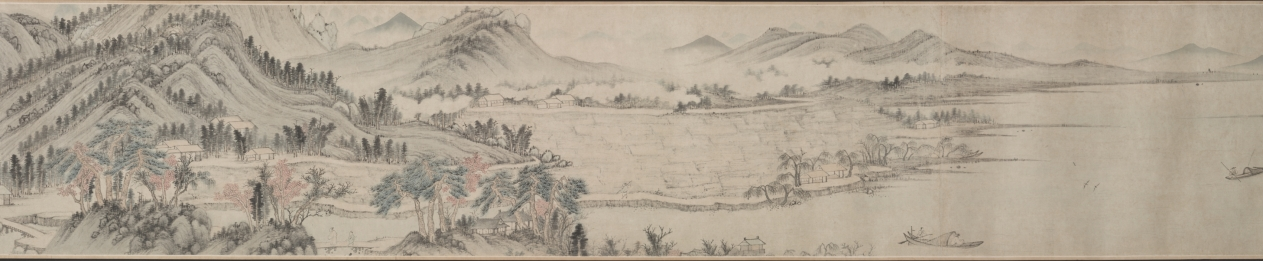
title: Mt. Taibo in the Style of Wang Meng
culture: China, Ming dynasty (1368–1644)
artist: Du Qiong (Chinese, 1396–1474)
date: 1442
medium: handscroll; ink and light color on paper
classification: Painting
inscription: Artist's inscription, signature, and 11 seals: [1 seal] Tung-yüan chai. Huang-ho-shan-ch'iao [Wang Meng] painted a painted called T'ai-po Mountain. Its brushwork is superior and admirable, which is very close to Yu-ch'en [Wang Wei, 699-759]. The cleverness of its composition, the maple groves and rustic temples, the inaccessible ravines and autumnal plateaus, the periolous peaks and strange rocks, etc., all seem to be so natural. The paper is only a little over eight feet, but the landscape has the range of a thousand miles. Once you open and note the contents, it is as if one were roaming among the mountain peaks enveloped in mist and clouds, and forgot the dusty world. When I first saw this, I was so mixed with excitement and joy that I could not take my hands off the painting. So I put it on the table, and tried my best to imitate it, forgetting sleeping and eating for about three months before it was completed. Although I do not dare to tread in the footsteps of Huang-ho shan ch'iao, I took great pains to capture his spirit in composition and colors. I do not know whether it would pass the judgment of the experts. On the fifteenth day of the fifth month, the seventh year of the Cheng-t'ung year [1442], inscribed by Tung-yüan, Tu Chiung. [2 seals] Yung-chia; Ching-chieh ming-men. [8 seals on painting] Tung-yüan chai; Ching-chieh ming-men; Yung-chia; Tu Ch'iung yin; Tung-yüan (repeated 5 times). trans. WKH/LYSL 3 colophons and 7 additional seals: 1 colophon and 2 seals of Chou Ting (1401-1487); 1 colophon and 2 seals of Wu K'uan (1435-1504); 1 colophon, dated 1655, and 2 seals of Lan Ying (1585-after 1664).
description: When a Chinese painter "imitated" a painting by a past master, the intention was never to produce an exact copy. Du Qiong, the Ming painter from Suzhou, is a case in point. The painting style of this handscroll is actually closer to that of Huang Gongwang (1269–1354) than to the style of Wang Meng (about 1301–1385). Both masters were active during the previous dynasty and are among the so-called Four Great Masters of the Yuan dynasty (1279–1368). In this painting, the interplay of styles, including Du Qiong's own, contribute to an inner dimension that is more than visual. Mt. Taibo is located in the province of Zhejiang and is known for its scenic beauty. In this scroll, however, it is not depicted literally. The image is an ideal representation of mountains in southeastern China.